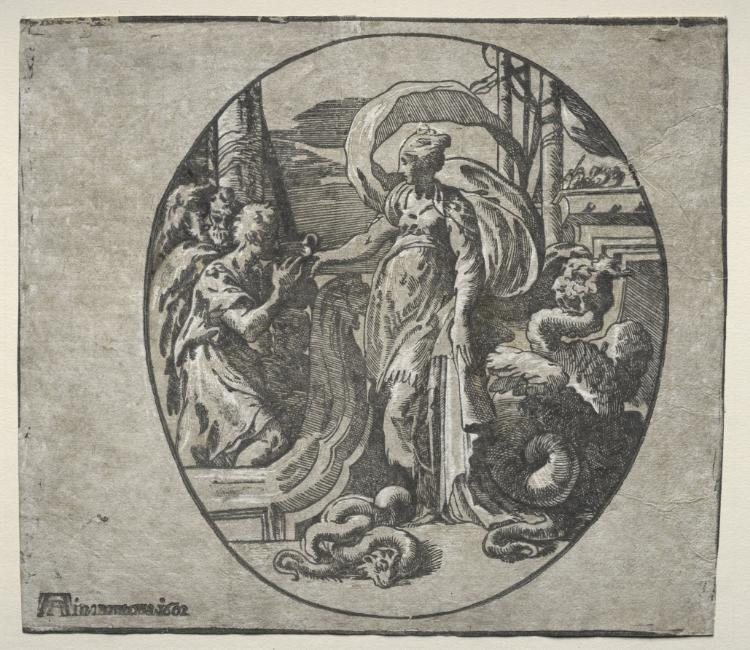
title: Circe Giving Drink to the Companions of Ulysses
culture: Italy, 16th century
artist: attributed to Antonio da Trento (Italian, c. 1508–c. 1550)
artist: after Parmigianino (Italian, 1503–1540)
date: 1540s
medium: chiaroscuro woodcut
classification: Print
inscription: Lower left, monogrammed: A(ndrea) A(ndreani) in mantoua 1602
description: This print is the second state of a chiaroscuro woodcut by Antonio da Trento after a drawing by Parmigianino. Andrea Andreani added the double A monogram and his address in the lower-left corner. This chiaroscuro woodcut depicts a scene from the Homer's epic poem Odyssey. During his journey back from the Trojan War, Odysseus (or Ulysses) visits the island of Aeaea. There, he meets the sorceress Circe, who changes most of his crew into swine. In this print, the enchantress is offering Ulysses's companions a cup containing a magical potion in order to bring them under her spell.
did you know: Parmigianino's drawing, which Antonio da Trento used as a model for his print, was allegedly stolen by da Trento, alongside other examples by Parmigianino.